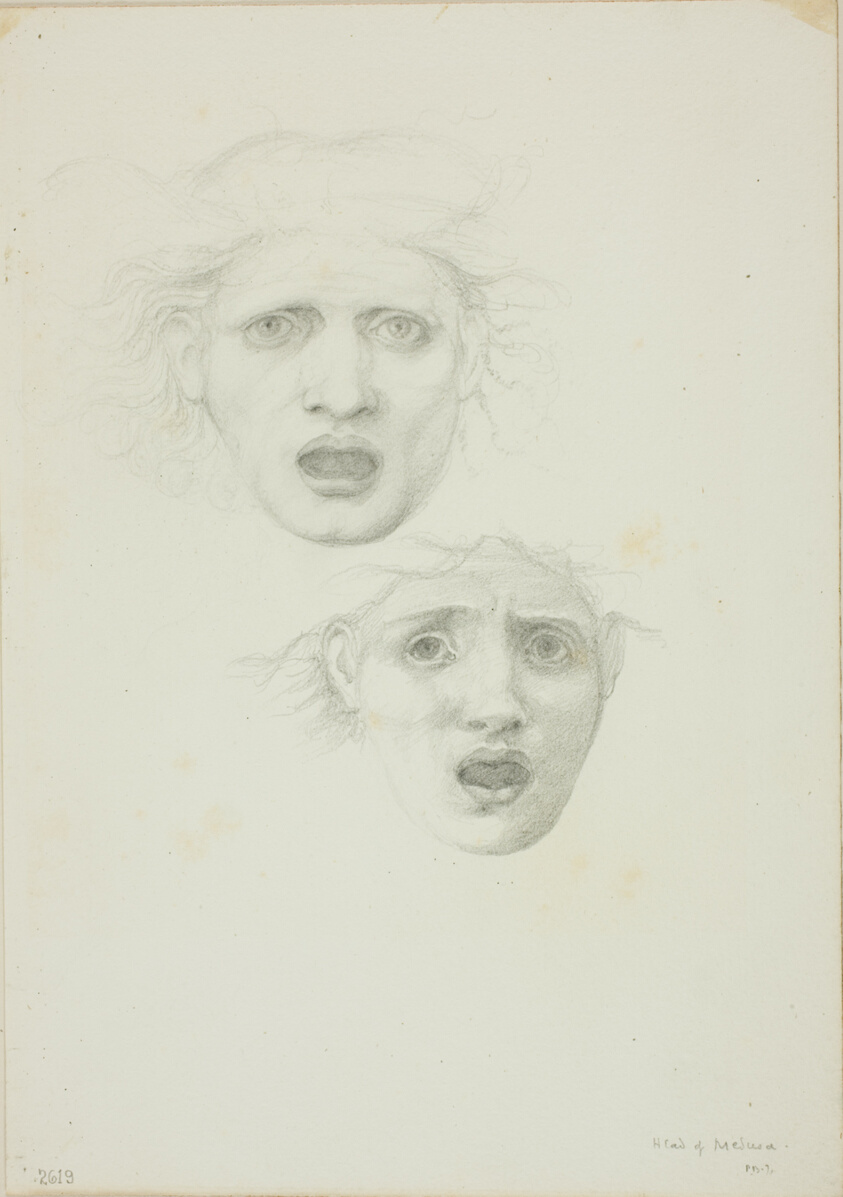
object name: Drawing and Watercolor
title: Head of Medusa, two studies for Rondanini Medusa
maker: Sir Edward Burne-Jones (English, 1833-1898)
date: c. 1873–77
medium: Graphite on ivory wove paper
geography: England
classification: graphite; drawings (visual works); prints and drawing